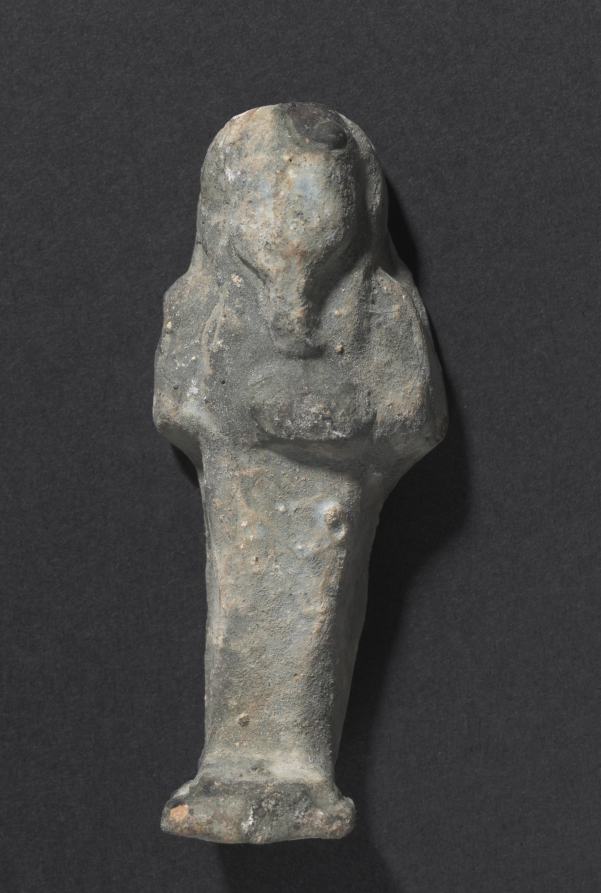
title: Shawabty of Ditamenpaankh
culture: Egypt, Late period (715–332 BCE), Dynasty 25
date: 715–656 BCE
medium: terracotta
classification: Funerary Equipment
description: High demand for shawabtys in the Late Period, a time when as many as 400 or more shawabtys were placed in the tomb with the deceased, gave rise to a specialized container for storing them: the shawabty box. This example is inscribed for the lady of the house, Ditamenpaankh, and was probably one of a pair originally made for her. The single-masted boat on the box's lid is perhaps an allusion to the pilgrimage of the deceased to the holy city of Abydos, the cult city of Osiris, king of the dead. The shawabtys inside are crude, mass-produced examples cast in an open mold. Made of terracotta, their blue paint imitates more costly shawabtys made of faience. As for the shawabty spell, it has been removed from its traditional location on the shawabty's front and relocated onto the sides of box, where it needed only to be written once, thus expediting production.